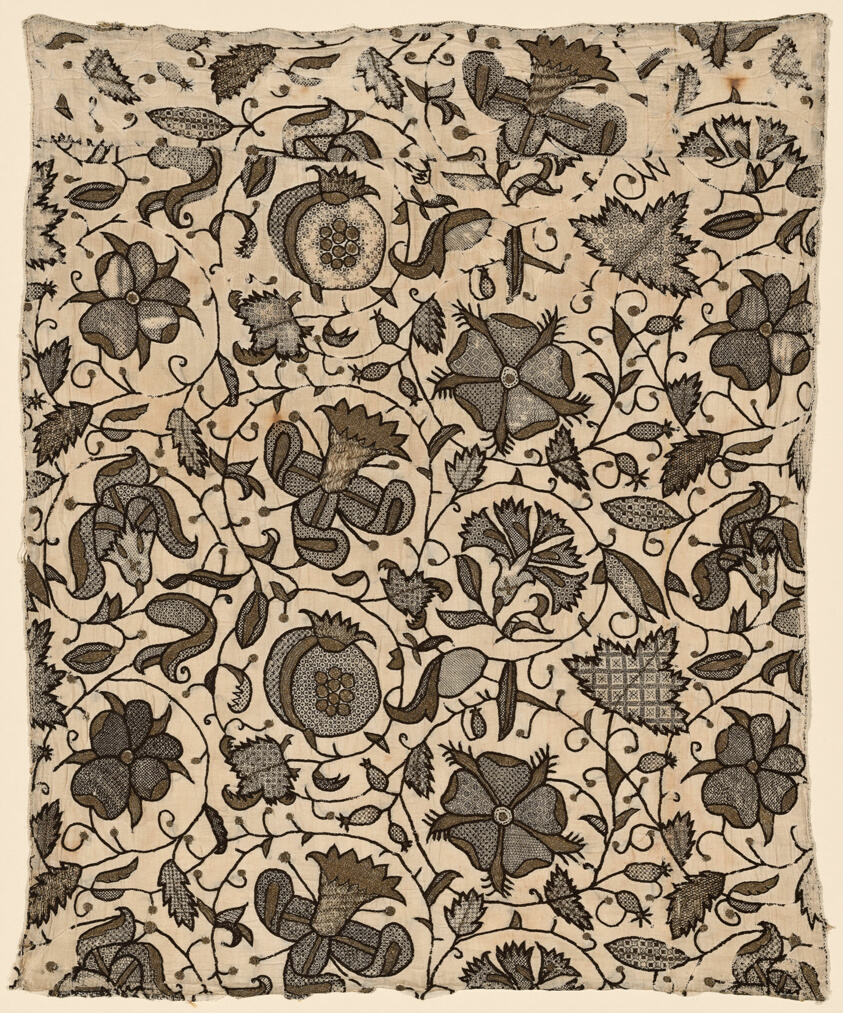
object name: Textile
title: Cushion Cover (Made from a Woman's Dress)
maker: England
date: late 16th century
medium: Linen, plain weave; embroidered with silk yarns and gilt-metal-strip-wrapped silk in Algerian eye, back, buttonhole, open buttonhole filling, chain, double running, overcast, plaited braid, and square open work stitches; laid work, couching and woven wheels; spangles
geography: England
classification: textile; needlework (visual works)